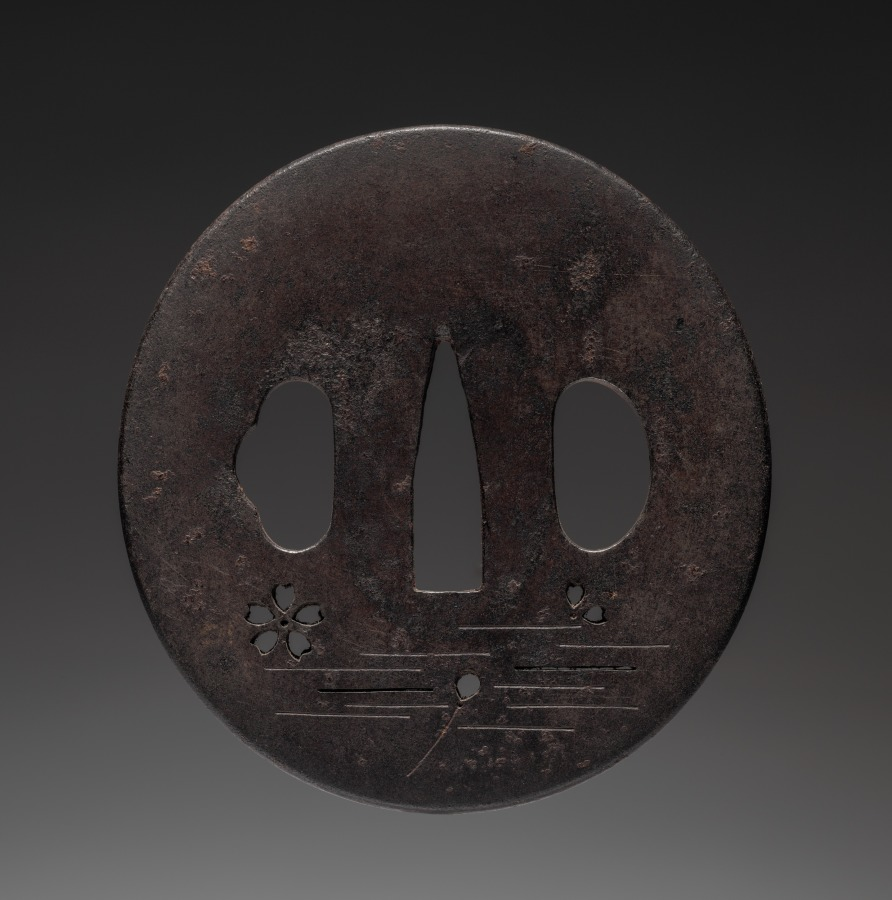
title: Sword Guard (Tsuba) with Cherry Blossoms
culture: Japan, Edo period (1615–1868)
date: mid-1800s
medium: iron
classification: Arms and Armor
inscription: signed "Masayuke, residing in Kofu [Edo]."